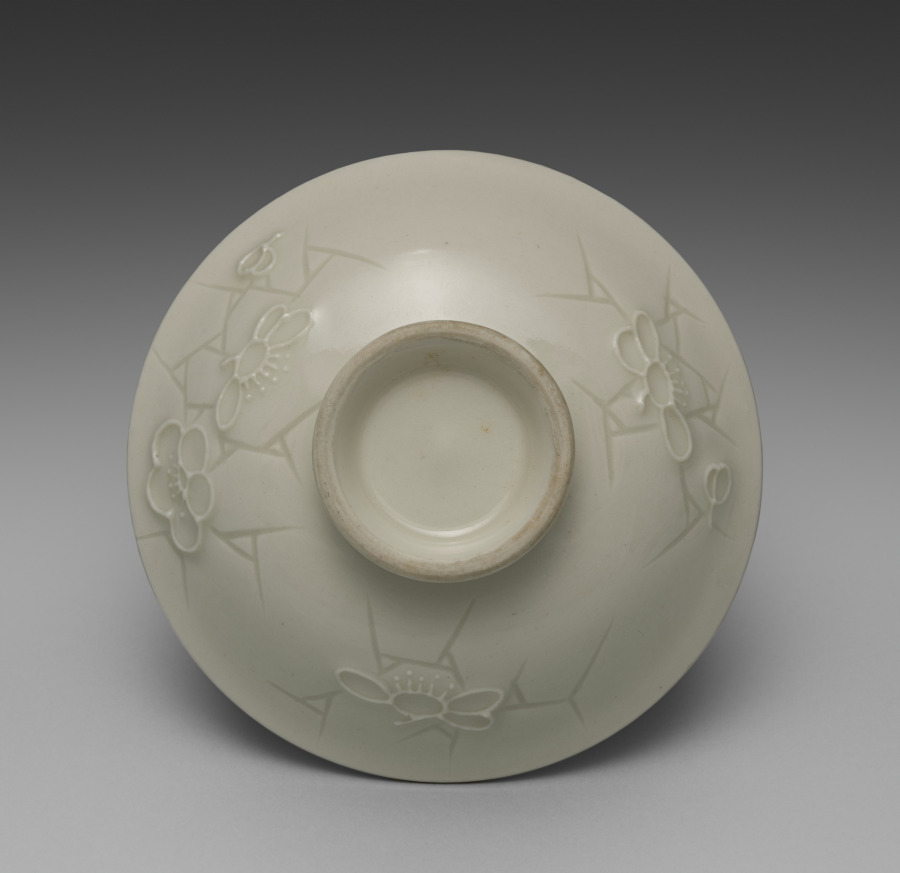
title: Cover for a Bowl from Dining Set with Plum Blossoms and Cracked-Ice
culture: Japan, Meiji period (1868–1912)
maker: Seifū Yohei II (Japanese, 1844–1878)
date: c. 1875–78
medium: Porcelain with molded designs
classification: Ceramic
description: Each item in this set has a delicate low-relief design of flowering plum branches over scattered, intersecting lines meant to resemble the cracked-ice surface of a frozen body of water and is signed on the base in gold pigment. While Yohei II produced many fine works in underglaze blue, like those produced by Kiyomizu Shichibei, he also made works in quite different styles later in his career, from the early 1870 s. In 1873, he was appointed purveyor to the Industrial Center of Kyoto Prefecture, a designation associated with Kyoto’s efforts to reach an international market through the port of Kobe; and from 1875 until his death, he was involved in national-level projects to present Japanese ceramics across the world. It was during this period that Yohei III was apprenticed to Yohei II, and it has been suggested that this set may in fact be an early example of Yohei III’s work, which he signed with his teacher’s name. Decorated with flowers resembling Japanese textile motifs, the set calls to mind the design of Yohei II’s pair of vases with plum blossoms in the Victoria and Albert Museum. Here, the elaborate trees created for a formal public exhibition setting have been translated into the approachable blossoms of the genteel domestic environment. While the designs are consistent across the pieces, each raised flower petal and pistil and each incised line in the ice was done by hand, so the cups, bowls, and dishes are similar yet unique. The bottoms of two boxes once identified the set’s owner, but the information has been deliberately obscured with black ink. However, inscriptions still visible appear to indicate two occasions, once at the end of July 1886 , and once again in June 1916 , when parts of the set were requested from Hokura in Niigata Prefecture. The location corresponds to a neighborhood in the present-day city of Jōetsu. The surname Tsuji 辻 also appears on a paper tag affixed to one of the box cloths. Future research may possibly reveal more about their provenance. A vase by Yohei III in a private collection combines the formal grandeur of the Yohei II vases in the Victoria and Albert Museum with the gentler design of this dining set, placing flowering plum trees against soft, scalloped-edge clouds resembling those in golden screens.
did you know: The dining wares have a creamy white coloration that the four boxes containing them identify as Korean in style.